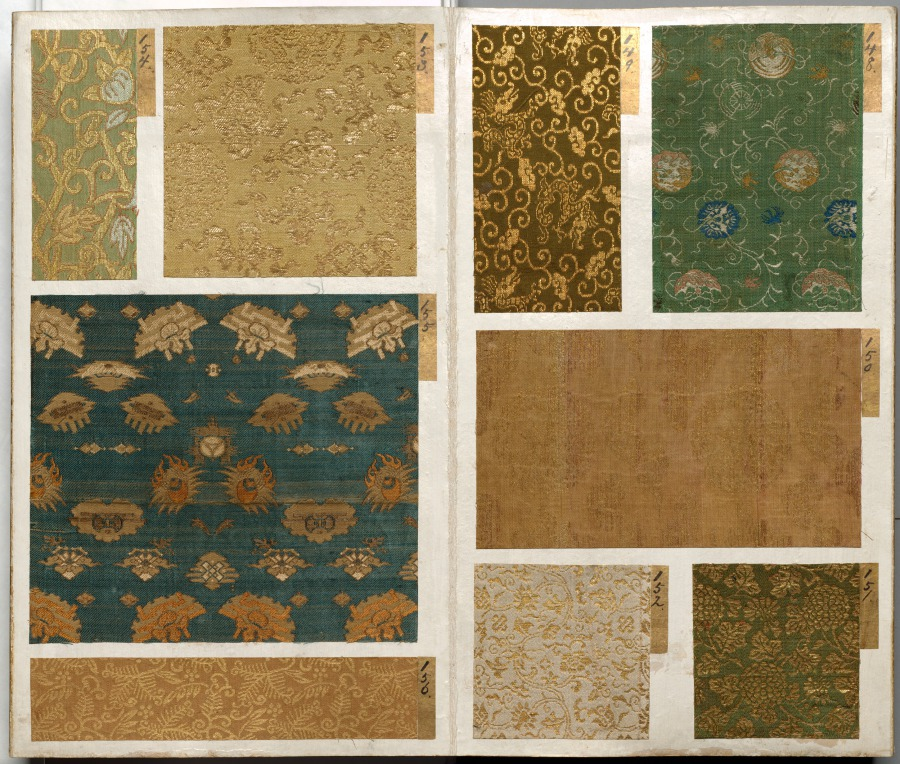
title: Album of Textile Samples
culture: Japan, Edo period (1615–1868)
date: 1600s-1700s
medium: silk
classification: Textile